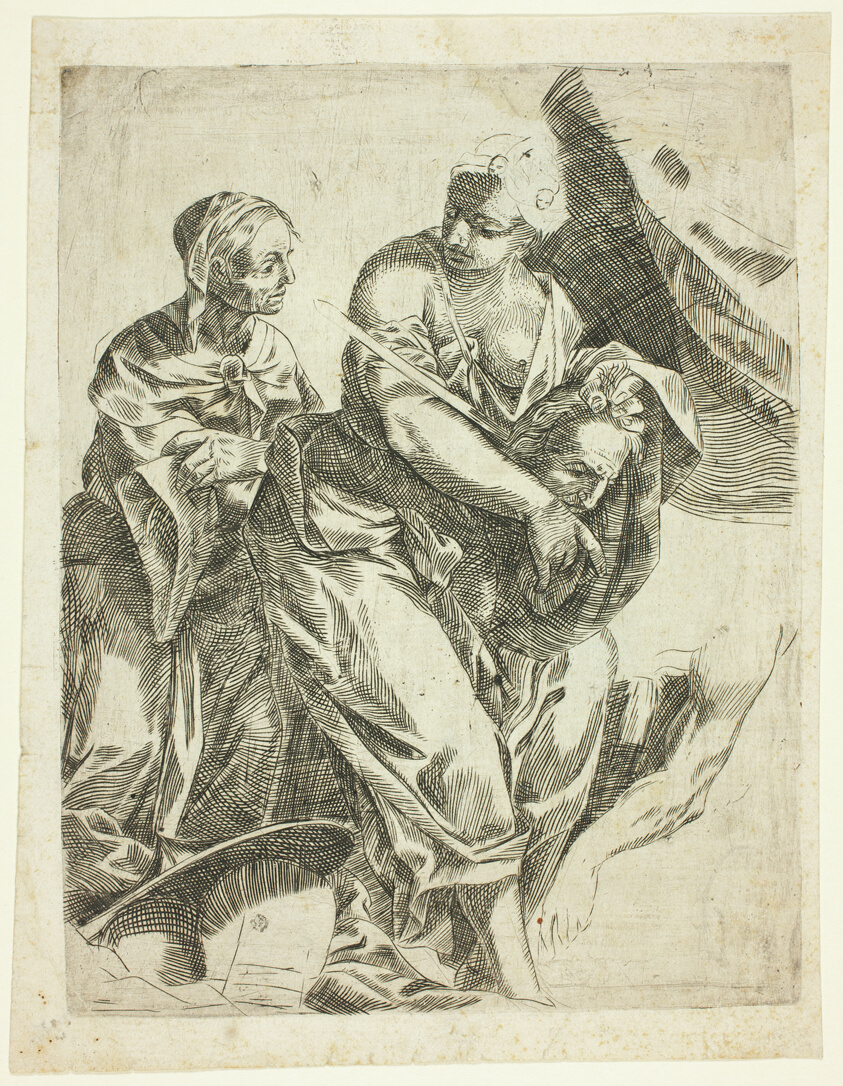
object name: Print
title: Judith with the Head of Holofernes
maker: Marco San Martino (Italian, 1615/25-1680/1700)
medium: Engraving in black on ivory laid paper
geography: Italy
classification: engraving; paper; print; prints and drawing